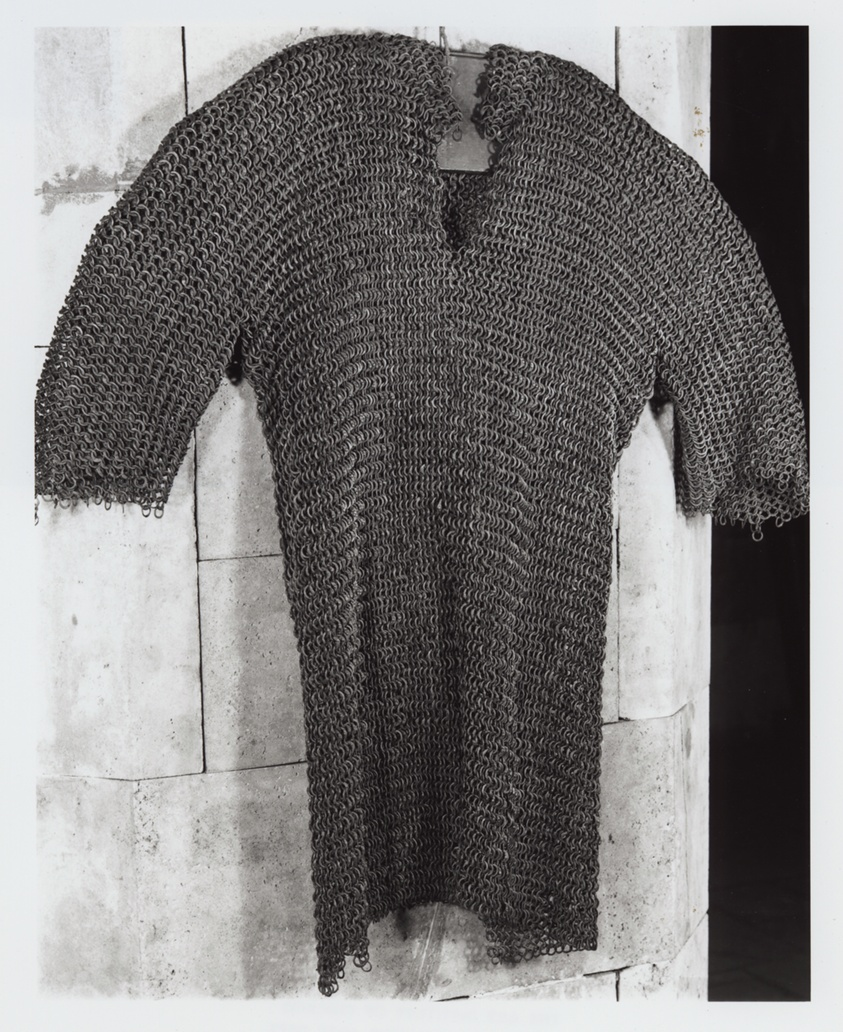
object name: Armor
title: Mail Shirt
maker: Islamic, possibly Indian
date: 17th century (?)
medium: Steel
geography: India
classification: suit-element; armor; arms and armor